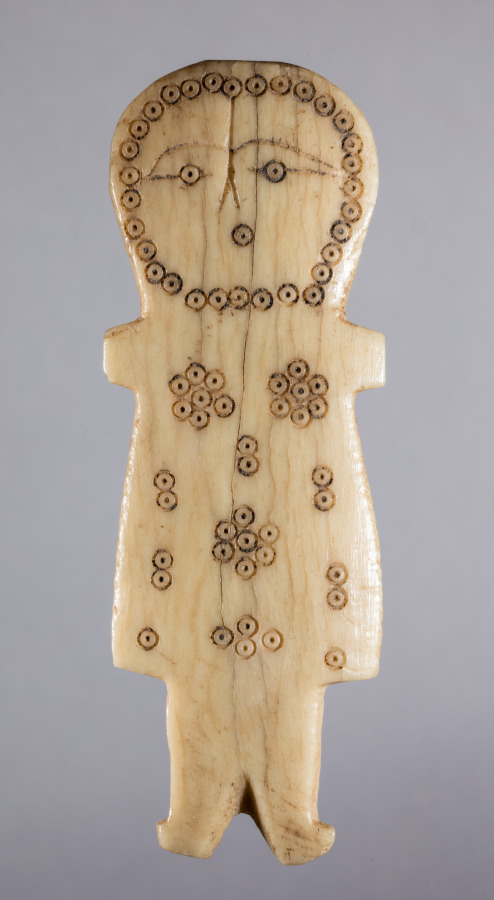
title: Figurine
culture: Iran, early Islamic period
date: 700s - 900s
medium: bone, incised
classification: Miscellaneous